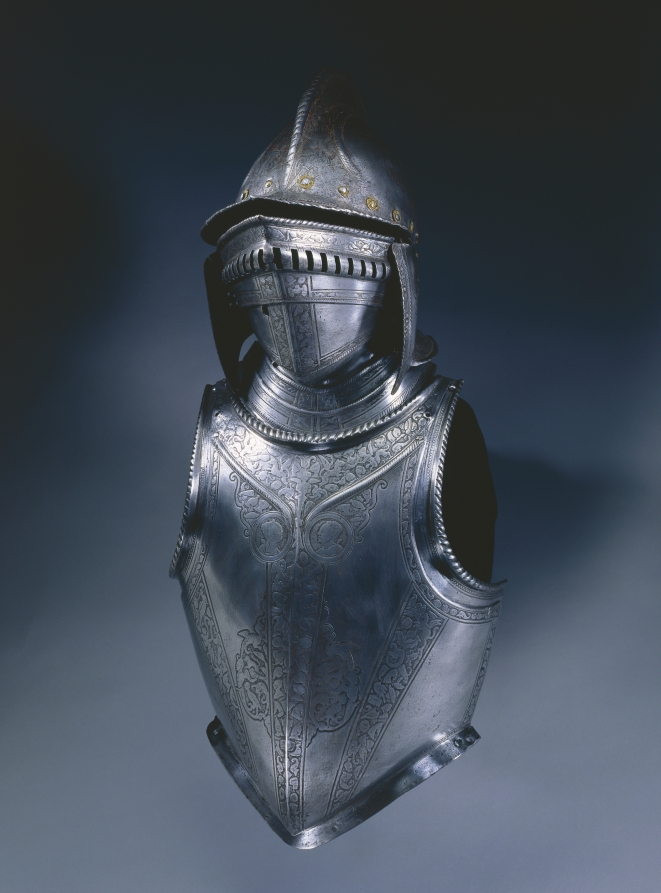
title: Breastplate with Etched Bands of Trophies and Medallions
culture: North Italy, 16th century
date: c. 1550–1600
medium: etched steel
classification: Arms and Armor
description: Shown here together is a burgonet, buffe, and breastplate all decorated with a technique known as etching. A burgonet is a light open helmet characterized by a peak, a fall over the eyes, and hinged earpieces. The face is protected by the addition of a buffe, a sperate detachable element worn with the open helmet that extends to the throat. It connects to the breastplate which protects the abdomen and is worn with a backplate.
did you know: Etching is a technique where either the design or its ground is bitten into the metal surface with acid, the rest being protected by a protective wax or varnish.